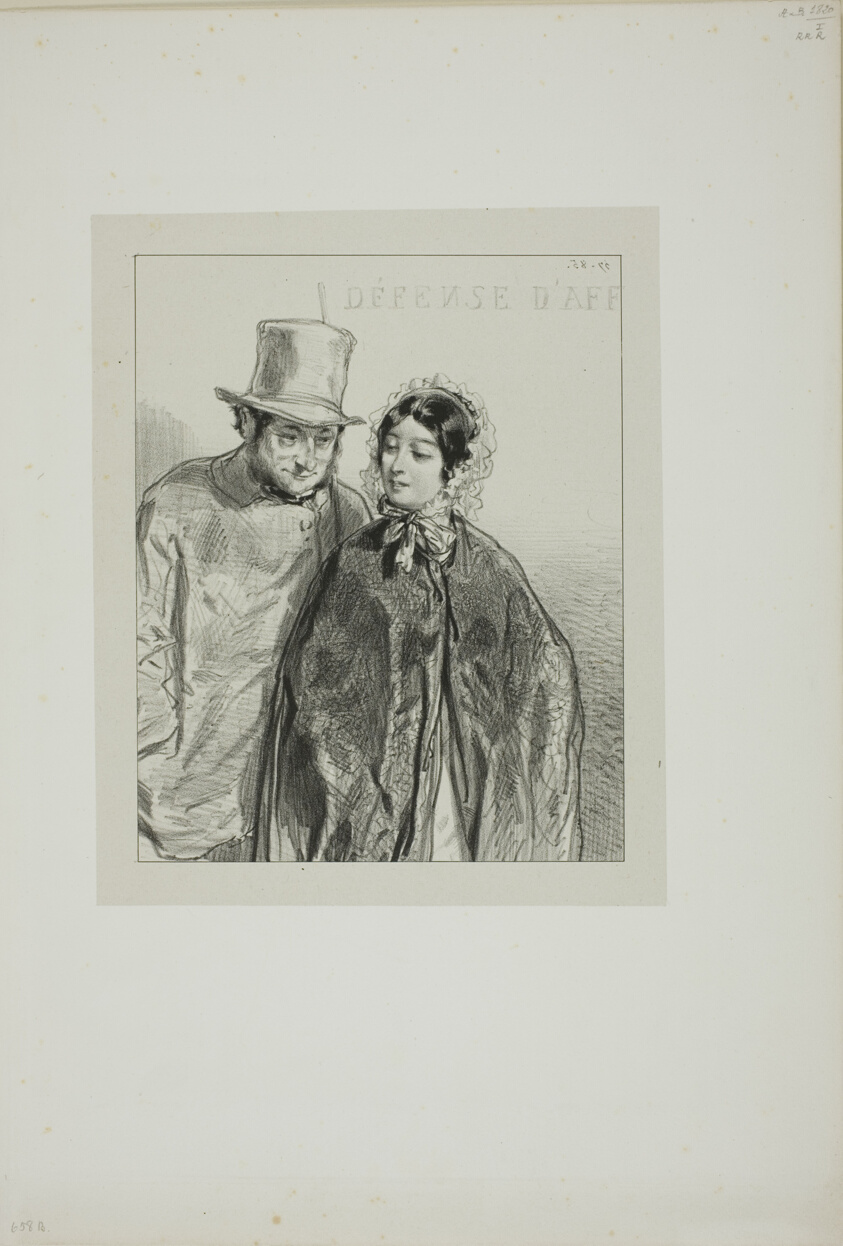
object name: Print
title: Masks and faces: Mr. Pipanthoud, vous ni affichez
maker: Paul Gavarni (French, 1804-1866)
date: 1857–58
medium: Lithograph in black on light gray China paper, laid down on ivory wove paper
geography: France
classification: lithograph; print; prints and drawing